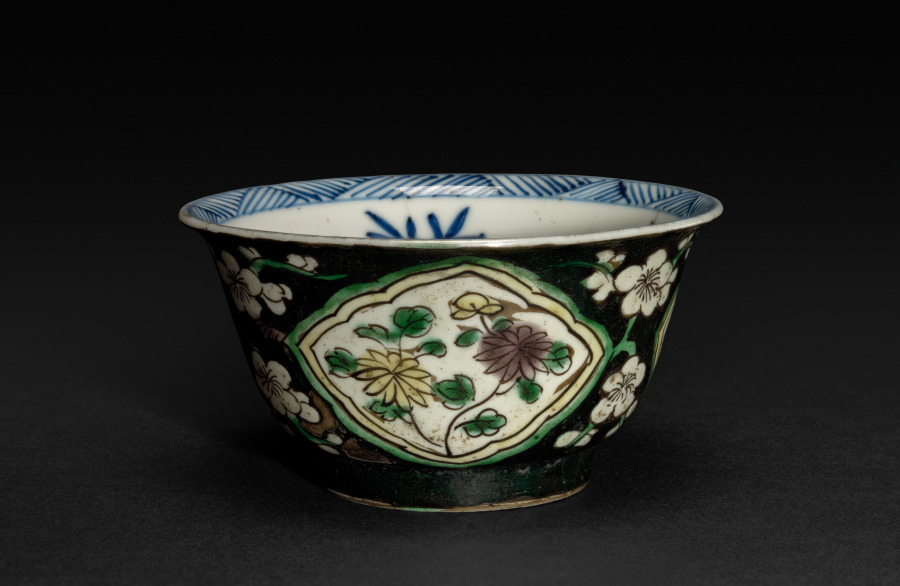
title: Cup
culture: China, Qing dynasty (1644-1911), Kangxi reign (1662-1722)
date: 1662–1722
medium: porcelain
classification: Ceramic